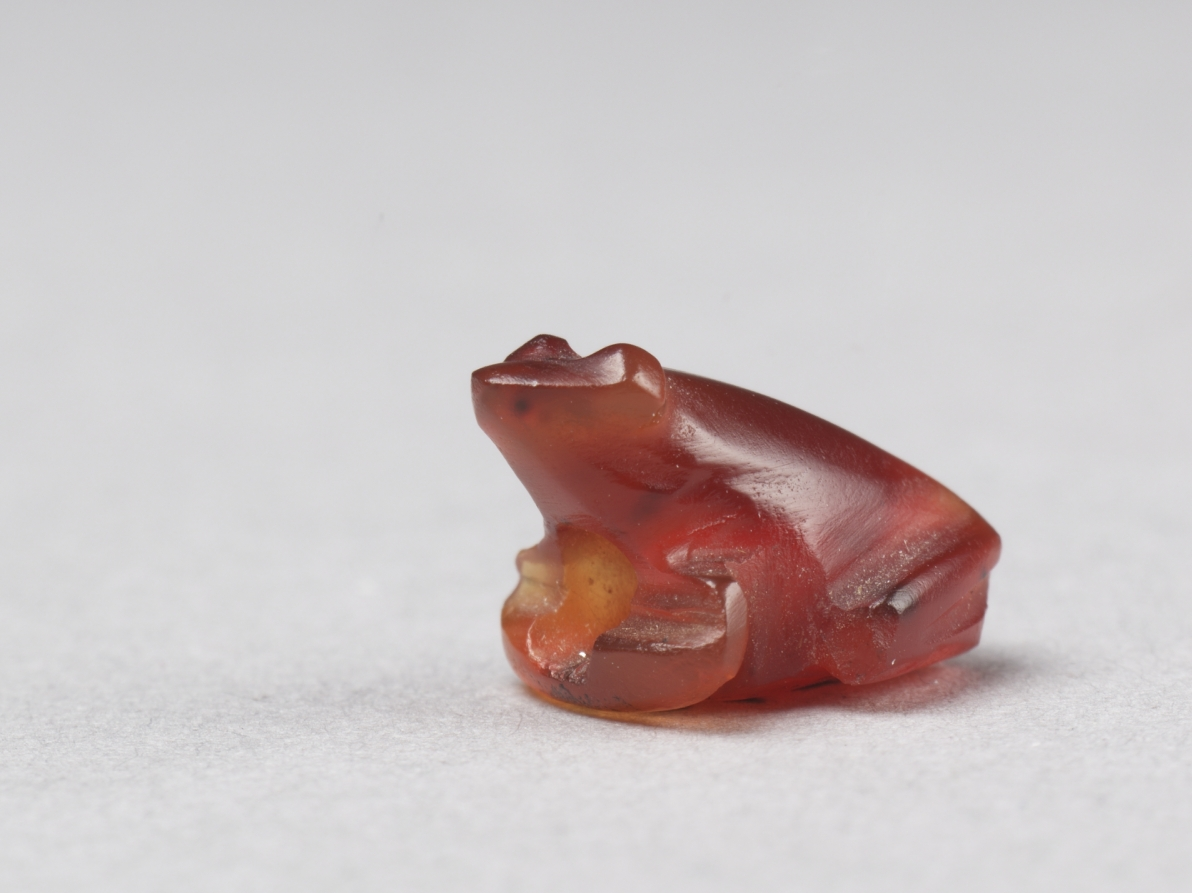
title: Frog Amulet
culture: Egypt, New Kingdom (1540–1069 BCE), Dynasty 18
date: c. 1540–1296 BCE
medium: carnelian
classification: Amulets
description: The frog, because of its numerous offspring, was a symbol of fertility. In fact, the hieroglyphic sign for 100,000 was a tadpole. Frog amulets were very popular both in semiprecious stone and in faience, and were worn by women hoping for an easy delivery. Both sexes wore the frog in expectation of a successful rebirth in the afterlife.